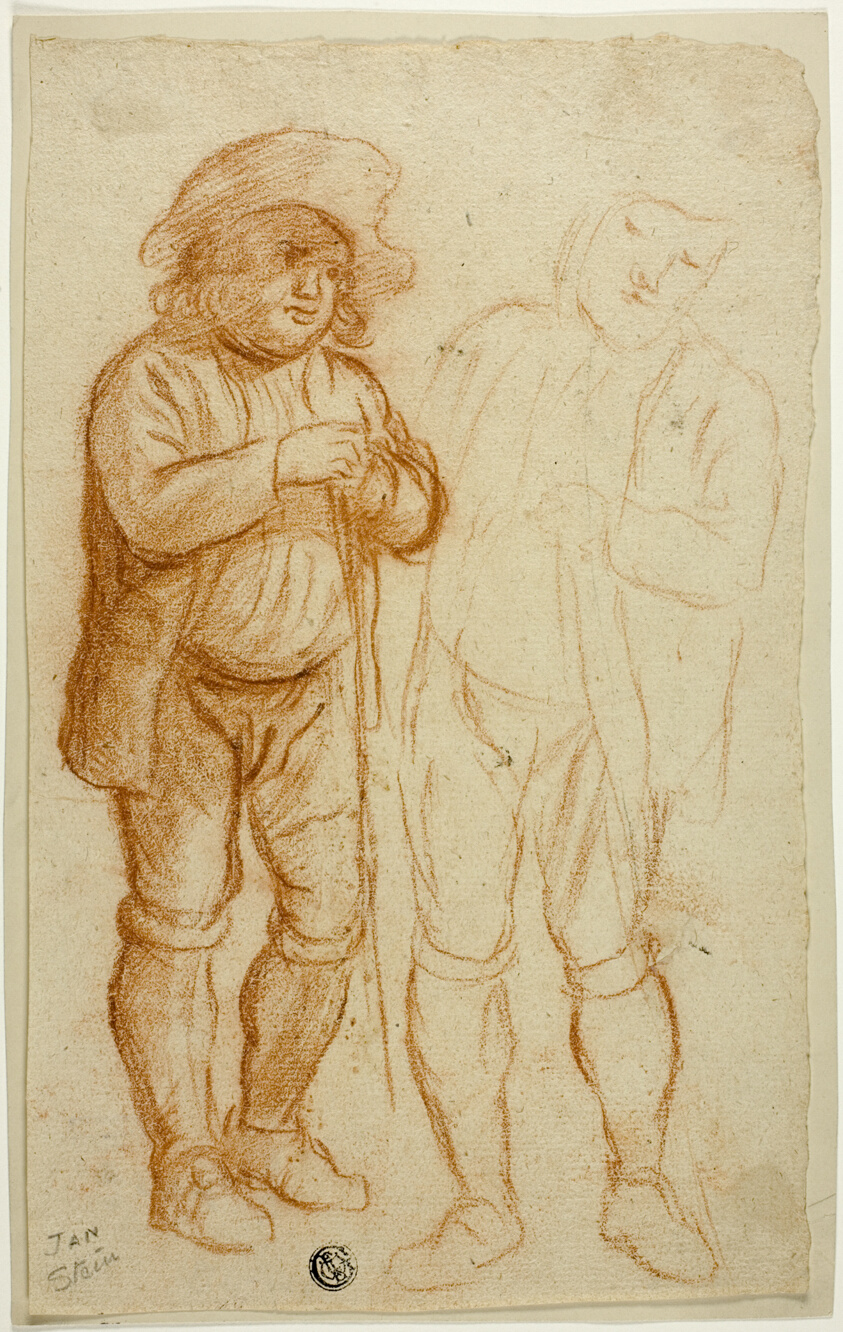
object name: Drawing and Watercolor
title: Two Sketches of Standing Man Leaning on Staff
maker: Possibly Jan Steen; Dutch, 1626-1679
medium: Red chalk, on ivory laid paper, tipped onto ivory wove card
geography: Holland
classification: chalk; drawings (visual works); prints and drawing